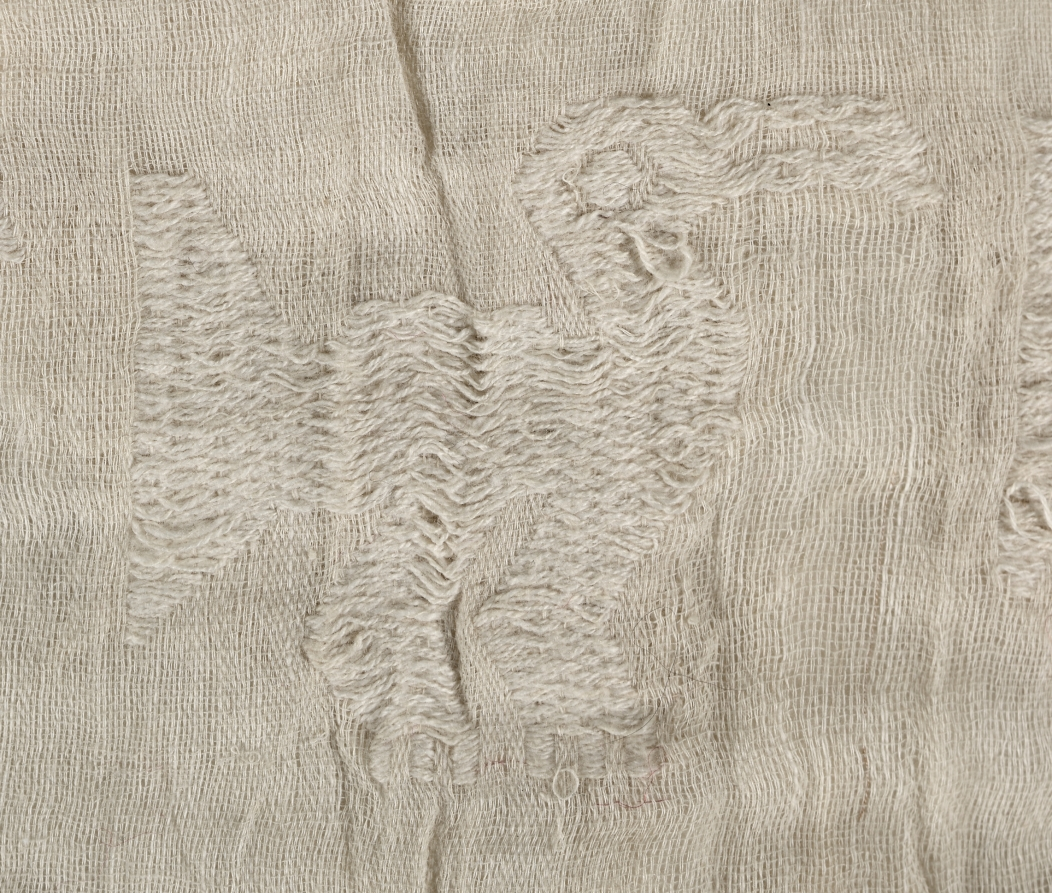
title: Padded Hat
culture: Peru, North Coast, Chimú style, 1200-1460s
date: 1460–1625 (radiocarbon date, 95.4% probability)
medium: cotton; plain weave, brocaded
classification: Garment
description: This garment may have been found with others in the collection that formed a matched set worn by a noble of the Chimú, who rose to power on Peru’s north coast after 1000 AD.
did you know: The Chimú forged an empire that thrived until the 1460s, when the Inka incorporated it into their own imperial domain.